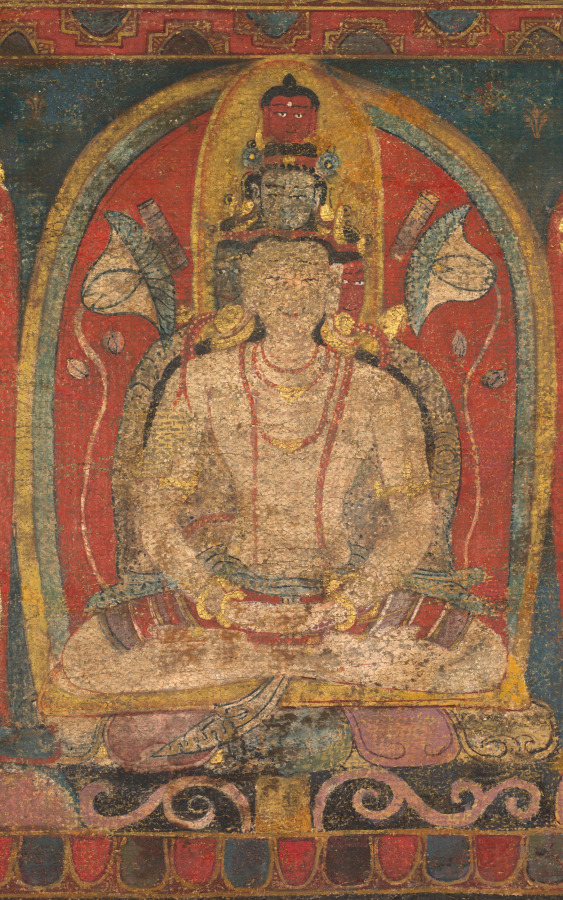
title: Tantric Buddha Vairochana as Vajrasattva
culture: Central Tibet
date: c. 1150–1200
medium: gum tempera, ink, and gold on cloth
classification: Painting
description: The seated Buddha dominating the composition is identified as Vairochana because of his hand gesture, the mudra communicating supreme enlightenment in which the index finger of one hand is grasped by the fingers of the opposite hand. His golden color and the tiny vajra—a six-pronged ritual object representing a thunderbolt—balanced on top of his finger suggest that he is in the guise of Vajrasattva, the summation of all enlightened beings. In his crown is the image of a monk, who is probably the guru of the donor, the small monastic figure at the lower right next to the lotus pedestal.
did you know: A mantra written behind the figures invokes their living presence in the thangka painting.